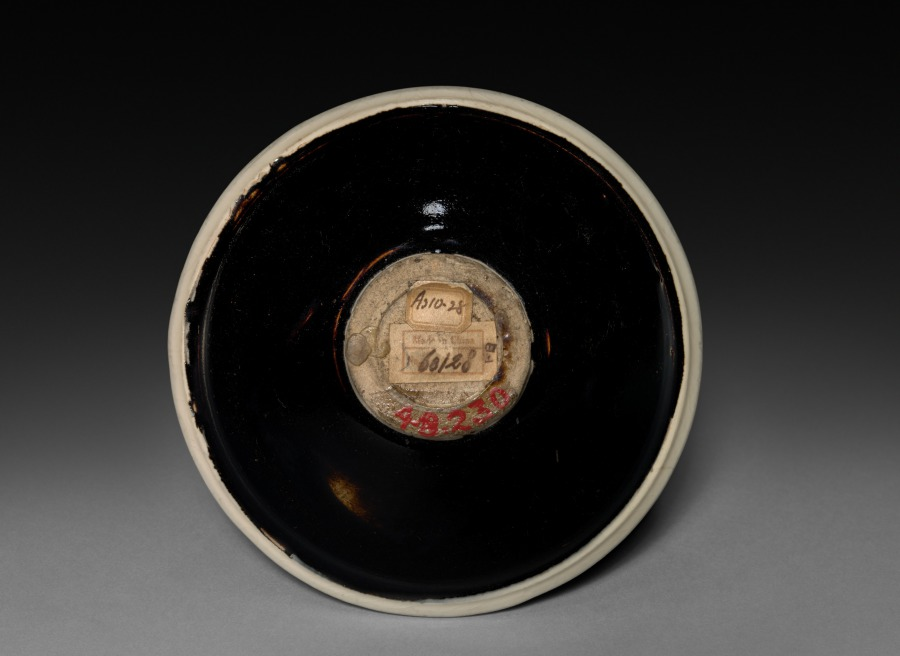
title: Tea Bowl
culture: China, Northern Song dynasty (960–1127)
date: 1100s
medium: stoneware, Northern black ware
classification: Ceramic